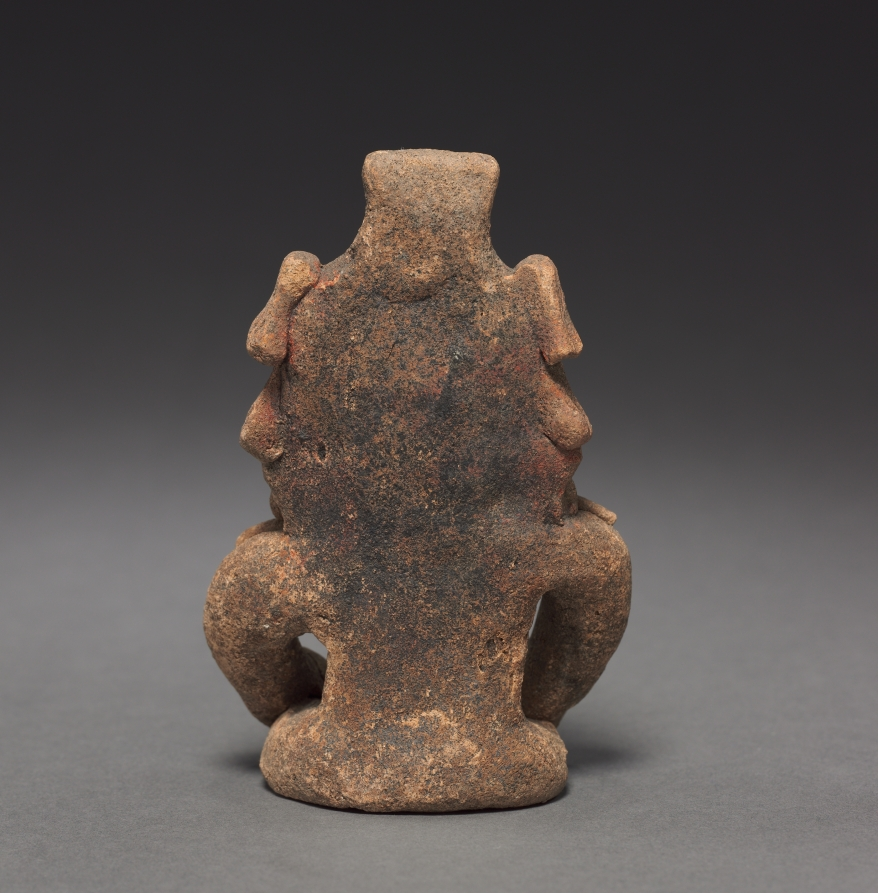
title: Seated Figurine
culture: Mexico, Veracruz, Remojadas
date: c. 150–1 BCE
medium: earthenware with asphalt paint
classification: Sculpture